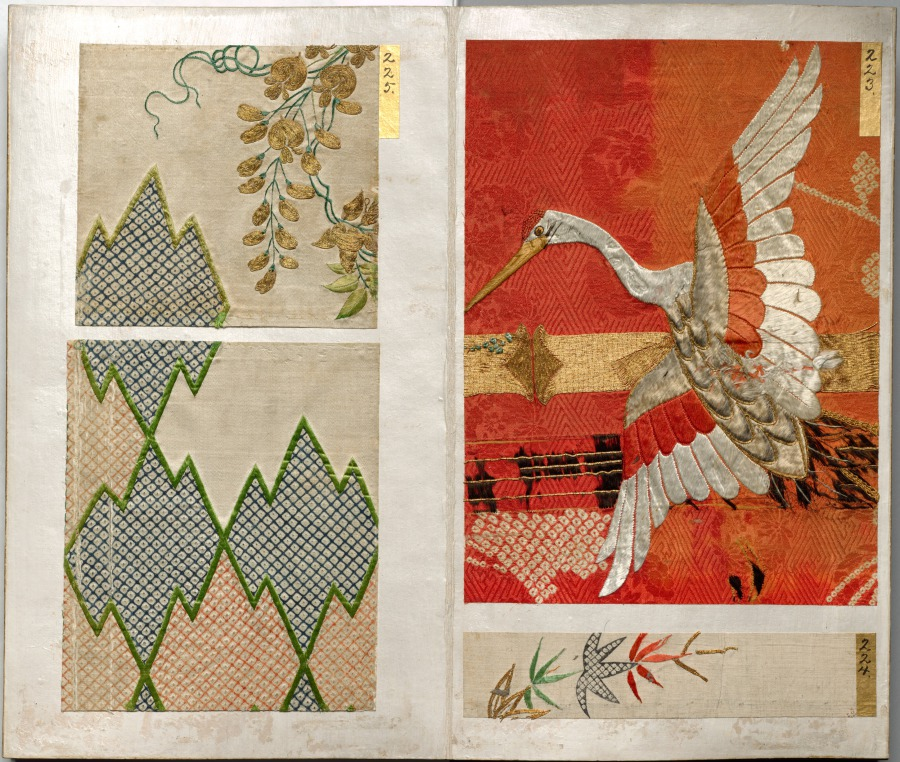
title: Album of Textile Samples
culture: Japan, Edo period (1615–1868)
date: 1600s-1700s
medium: silk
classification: Textile